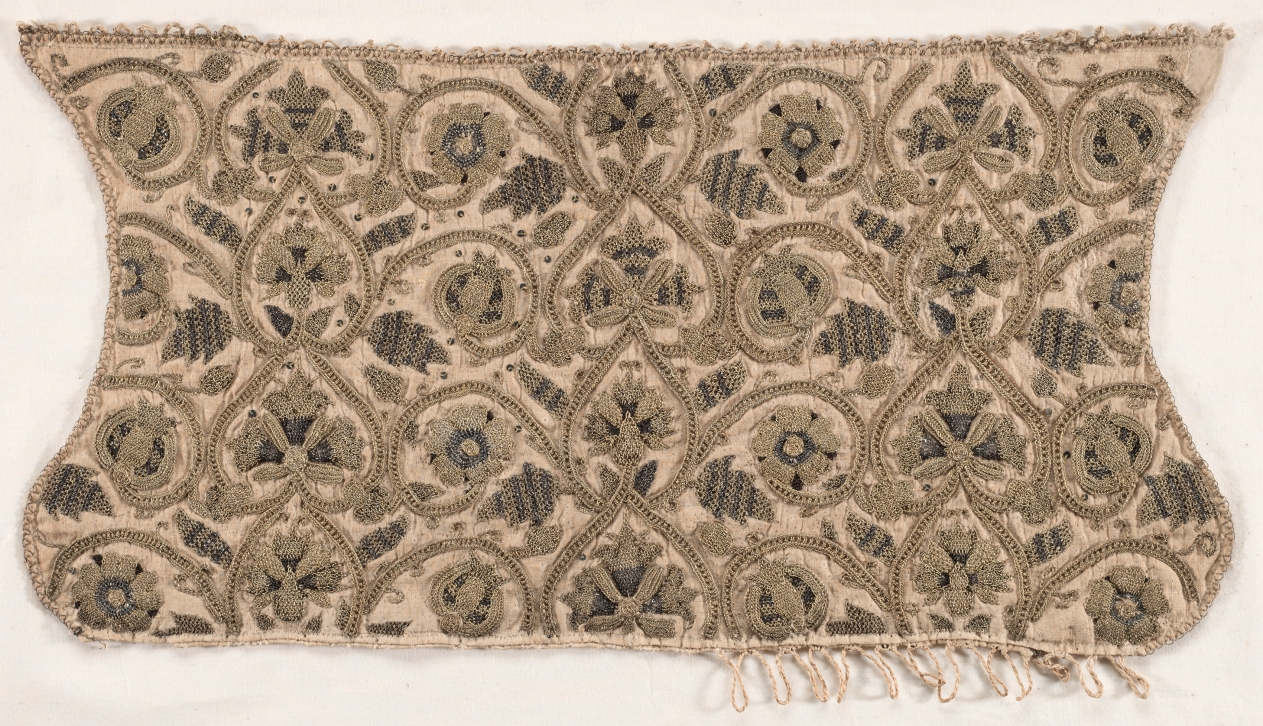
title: Coif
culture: England, Elizabethan Period, late 16th century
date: late 1500s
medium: Silk, gold and silver thread, sequins, padding, linen; embroidery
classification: Embroidery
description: According to Elizabethan embroidery scholar Jacqui Carey, construction of this woman’s coif is typical of the period, as is its design. The coif is a single piece of embroidered plain weave linen, cut in the usual way. The embroidery features pomegranate, honeysuckle, rose, carnation and acorn motifs set within stylized undulating stems and foliage. Most of the embroidery is worked with two distinct types of metal thread (thin metal strips wrapped around a silk core)—gilt thread and silver thread which has tarnished to black. Black silk thread also is used for the embroidery. Nine different stitches are used on the coif, including Elizabethan blanket stitch (variation three), Elizabethan ladder with filling, chain stitch, Elizabethan double Vandyke/twisted chain, Elizabethan plaited braid stitch (standard version), Elizabethan Ceylon stitch, Elizabethan trellis stitch, corded double detached buttonhole, and Elizabethan spider’s web. Many of the motifs are padded underneath the embroidery, likely with wool.